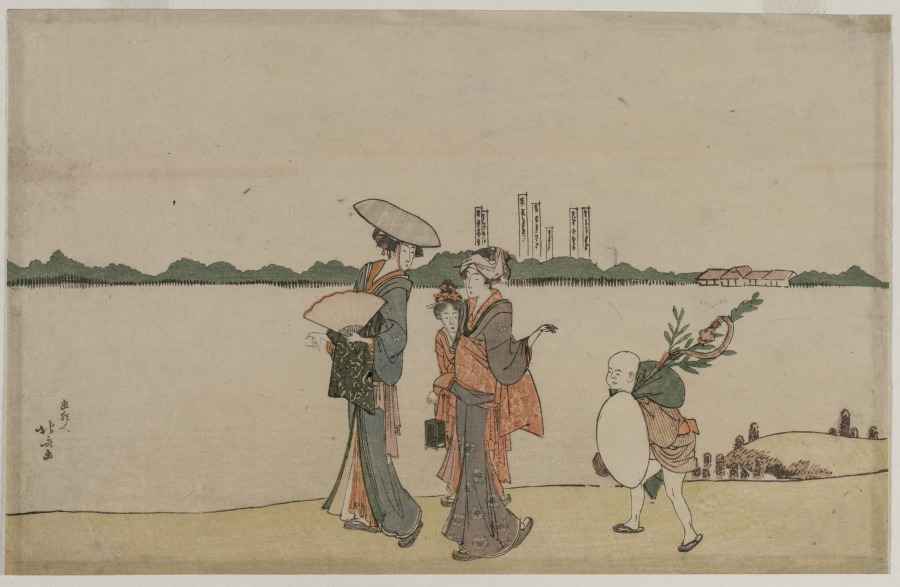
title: Women and Children Walking Along the Sumida River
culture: Japan, Edo period (1615–1868)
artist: Katsushika Hokusai (Japanese, 1760–1849)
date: early 1800s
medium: color woodblock print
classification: Print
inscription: Signature: Gakyojin Hokusai ga